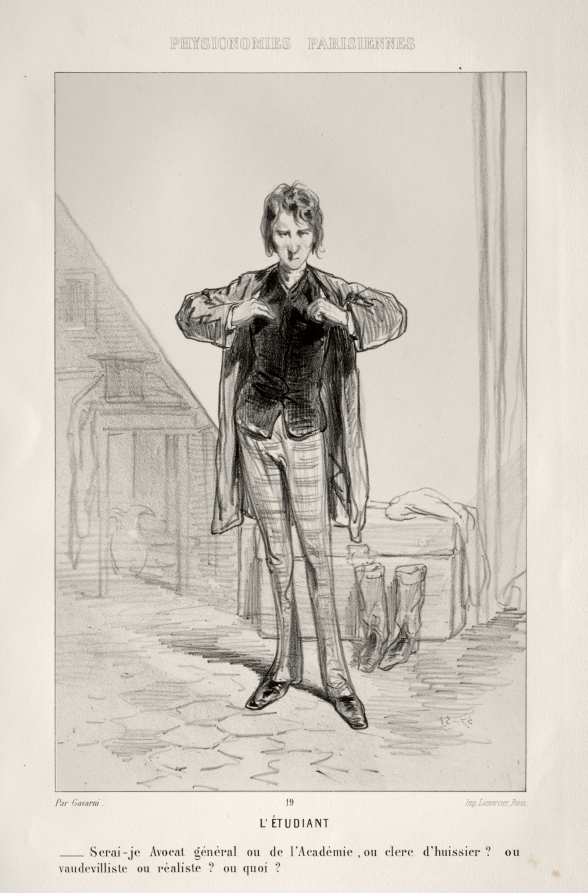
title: L'Étudiant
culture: France, 19th century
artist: Paul Gavarni (French, 1804–1866)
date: c. 1857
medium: lithograph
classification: Print